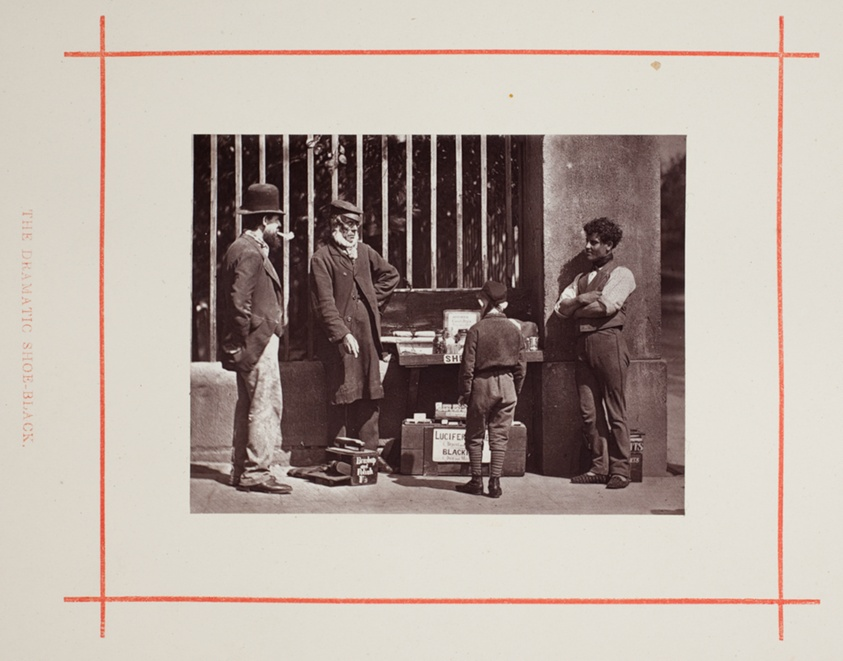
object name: Photograph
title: The Dramatic Shoe-Black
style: 19th century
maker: John Thomson (Scottish, 1837–1921)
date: 1877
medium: Woodburytype, from the album "Street Life in London"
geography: Scotland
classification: photograph; photography